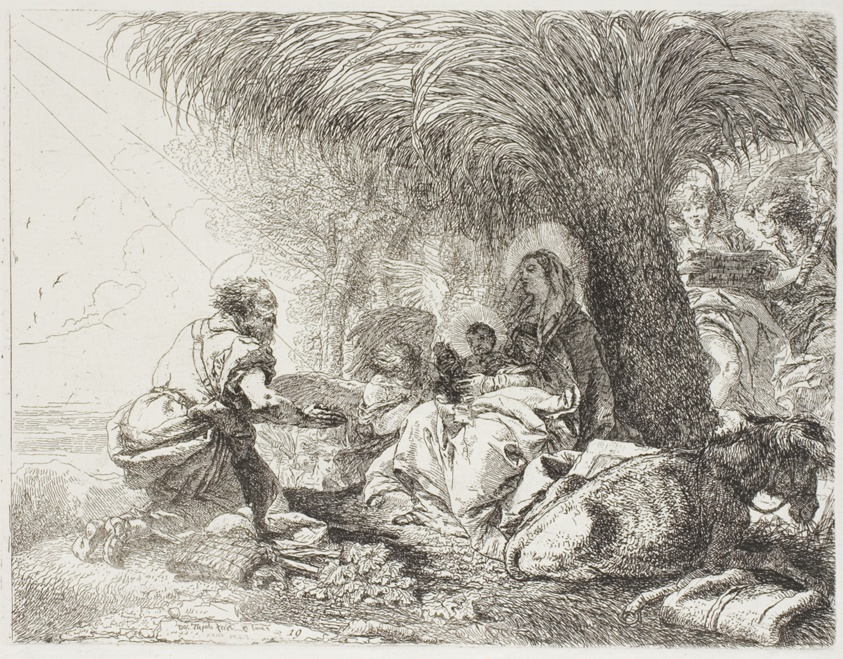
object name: Print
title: Joseph Adoring the Child While Two Angels Sing, plate nineteen from The Flight into Egypt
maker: Giovanni Domenico Tiepolo (Italian, 1727-1804)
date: 1752, published 1753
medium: Etching on paper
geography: Italy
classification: etching; print; prints and drawing